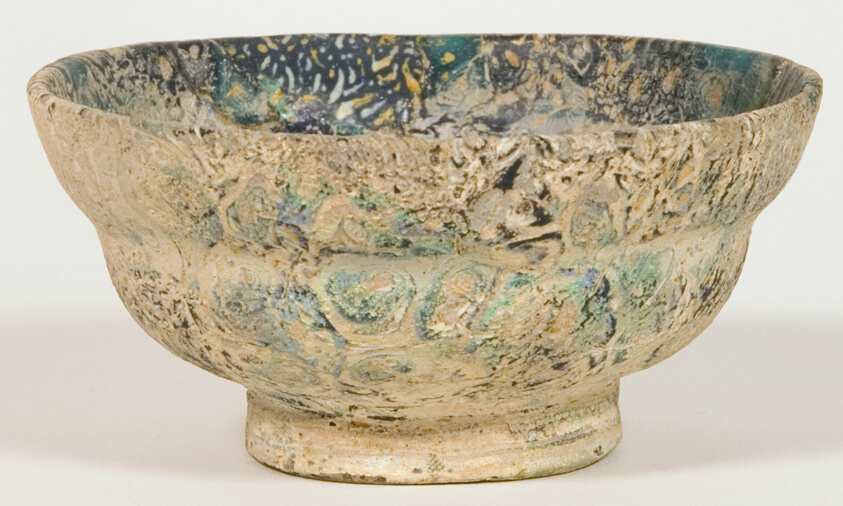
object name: Vessel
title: Bowl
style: syrian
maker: Roman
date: late 1st century BCE-early 1st century CE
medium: Glass, cast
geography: Syria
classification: bowl; glass; vessel; ancient art